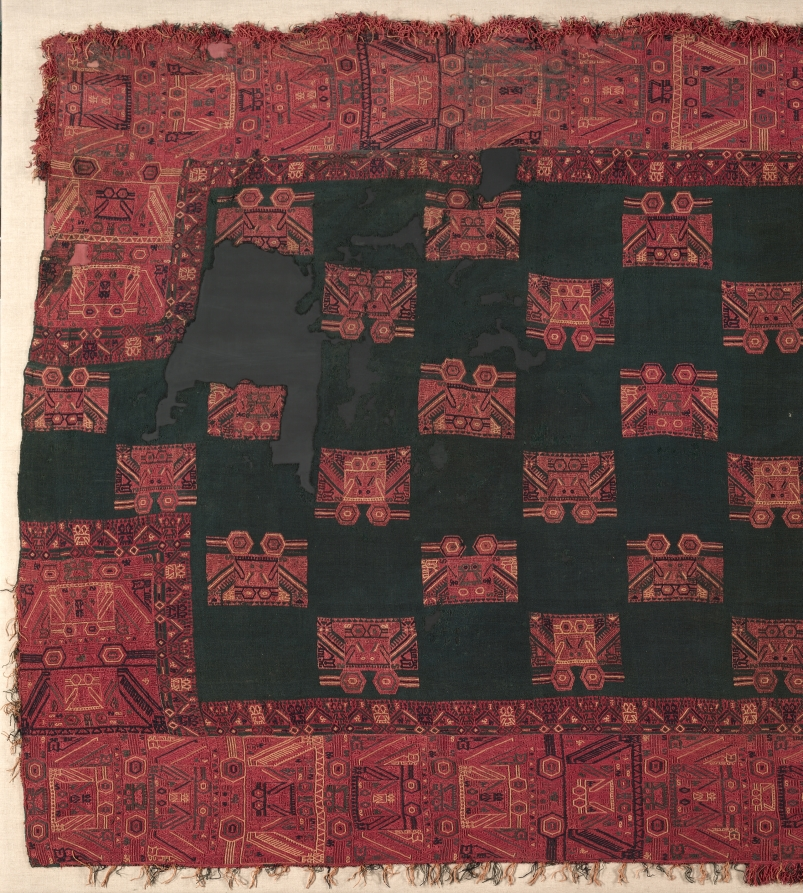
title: Mantle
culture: Peru, South Coast, Paracas (Cavernas) style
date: c. 300 BCE–200 CE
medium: camelid fiber: plain weave with embroidery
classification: Textile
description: Buried in shaft-tombs, or rectangular sunken chambers, the Paracas dead were wrapped in layers of cloth and accompanied by pottery, food, and other offerings. The dry environment of the Paracas Peninsula helped preserve many of these textiles, including richly ornamented garments buried with important individuals. This mantle, probably worn like a cloak, relates closely to the tunic (CMA 1946.227) and long headband (CMA 1946.228) due to their shared imagery. Its double-headed bird motifs— embroidered in vivid red, blue, yellow, and green yarns—likely had symbolic significance, although the specific meaning remains unknown.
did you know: The profusion and decoration of textiles in Paracas burials shows the value placed on cloth.